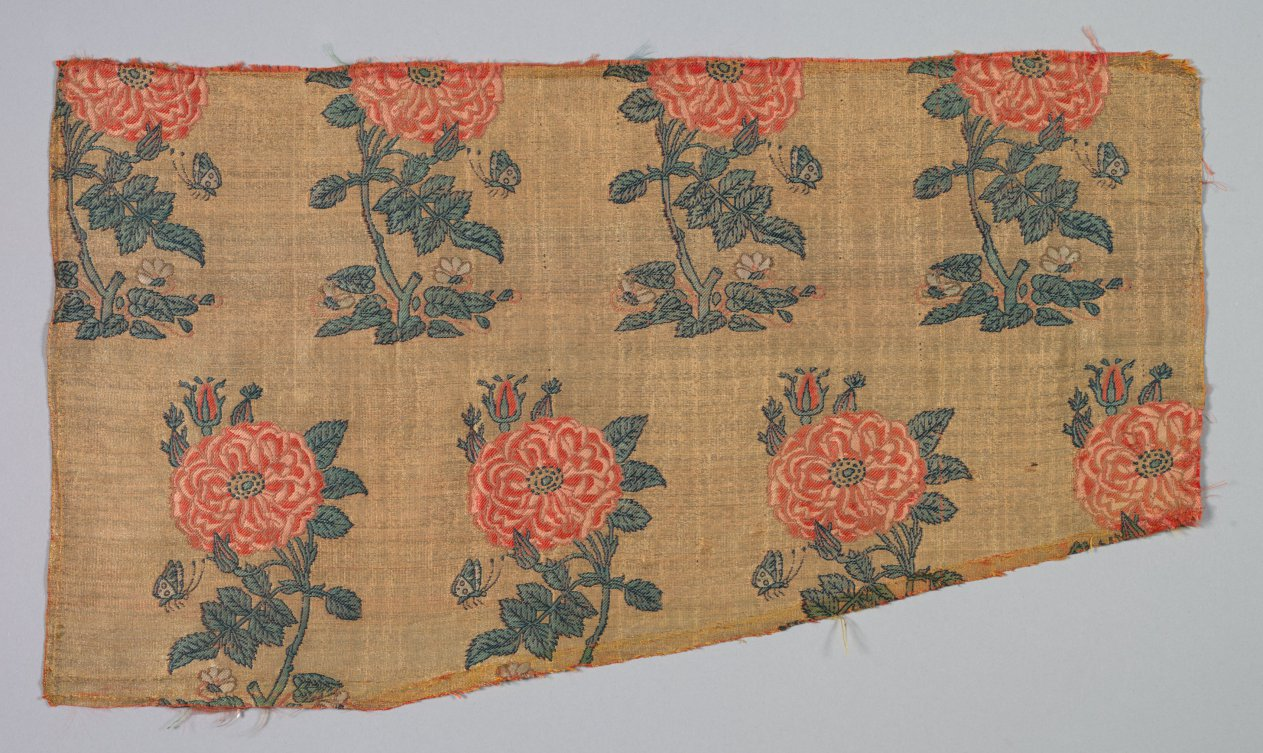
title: Fragment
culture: Iran, early 17th century (period of Shah Abbas)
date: early 1600s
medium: compound tabby ground with diasper pattern, brocaded; silk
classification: Textile